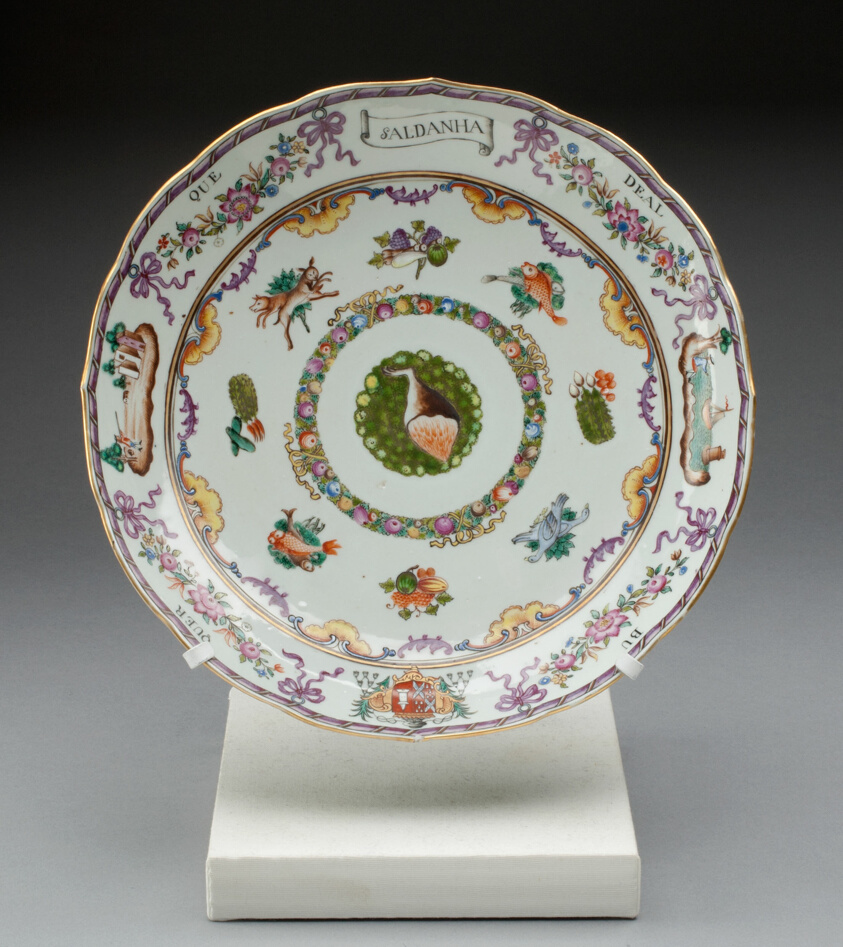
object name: Ceramics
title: Dish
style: chinese export, Chinese (culture or style), East Asian, asian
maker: China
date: 1760/70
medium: Hard-paste porcelain with polychrome enamels and gilding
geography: China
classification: dish (vessel); chinese export porcelain; porcelain; european decorative arts; ceramics